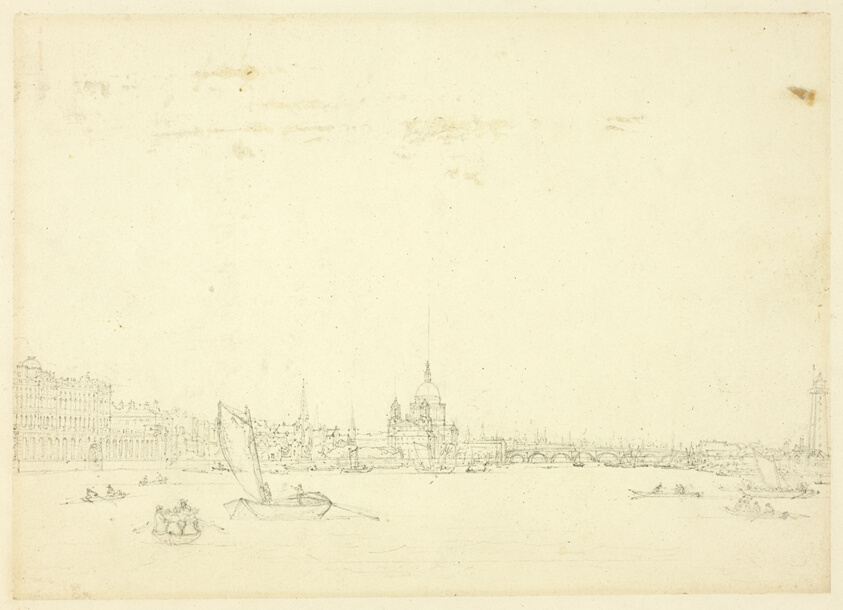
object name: Drawing and Watercolor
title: Study for View of London from the Thames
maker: Augustus Charles Pugin (English, born France, 1762-1832); Thomas Rowlandson (English, 1756-1827)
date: c. 1809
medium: Graphite on cream wove paper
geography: England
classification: graphite; drawings (visual works); prints and drawing